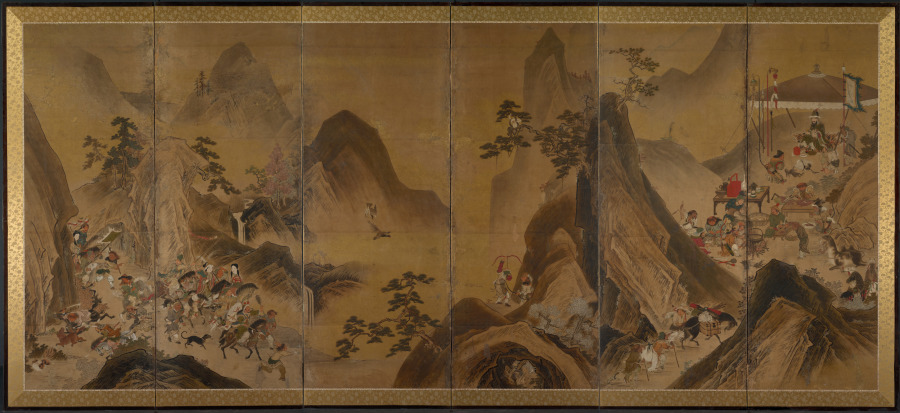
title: Tartars Hunting in a Mountain Landscape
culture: Japan, Edo period (1615–1868)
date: first half of 1600s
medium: six-panel folding screen; ink, color, and gold on paper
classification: Painting